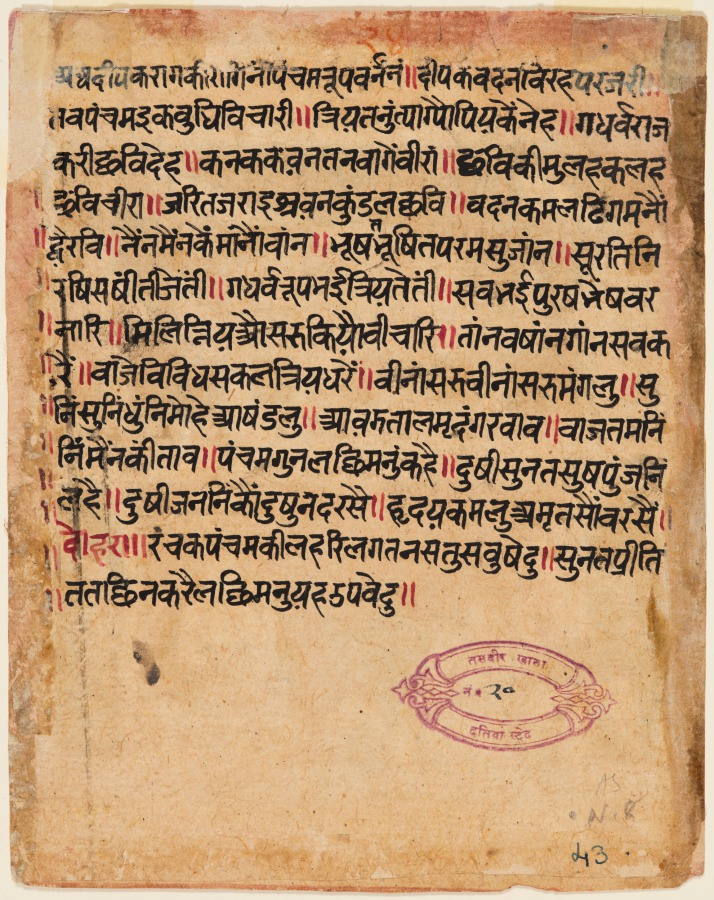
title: Three Musicians Perform Before a King: Shri Raga, from a Ragamala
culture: Central India, Madhya Pradesh, Malwa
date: c. 1650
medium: gum tempera, ink, and gold on paper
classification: Painting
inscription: Verso: Text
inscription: Verso: Stamped, Tasvir Khana, No: 4, Datiya State (Later date), the lower stamp is not visible in the image.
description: A king sits on a throne with a yogic band around his legs, listening to the music of two sages: a blue-skinned sage on a stringed instrument (vina), and a white-skinned one playing cymbals. A standing percussionist accompanies them on a drum. An attendant behind the king holds the royal canopy over his head.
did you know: Rainspouts in the form of mythical elephant-crocodiles (makara) hold yellow flags in their trunks.